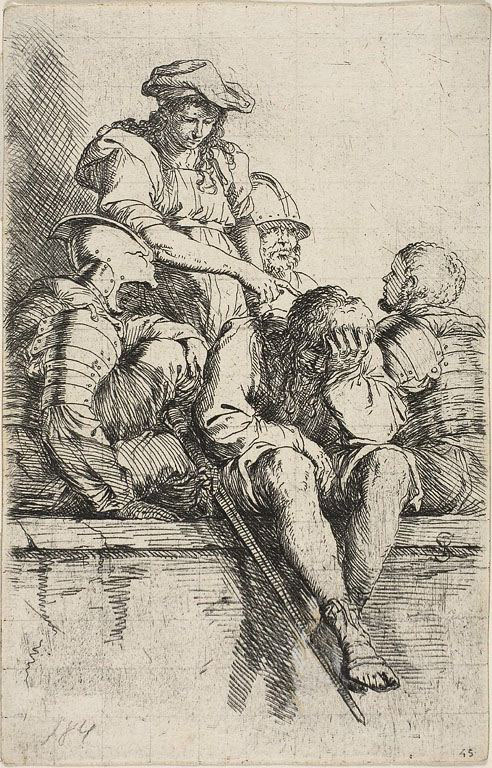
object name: Print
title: Four warriors and a standing youth, who points down at one of them, from Figurine series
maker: Salvator Rosa (Italian, 1615-1673)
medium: Etching on ivory laid paper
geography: Italy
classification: etching; print; prints and drawing